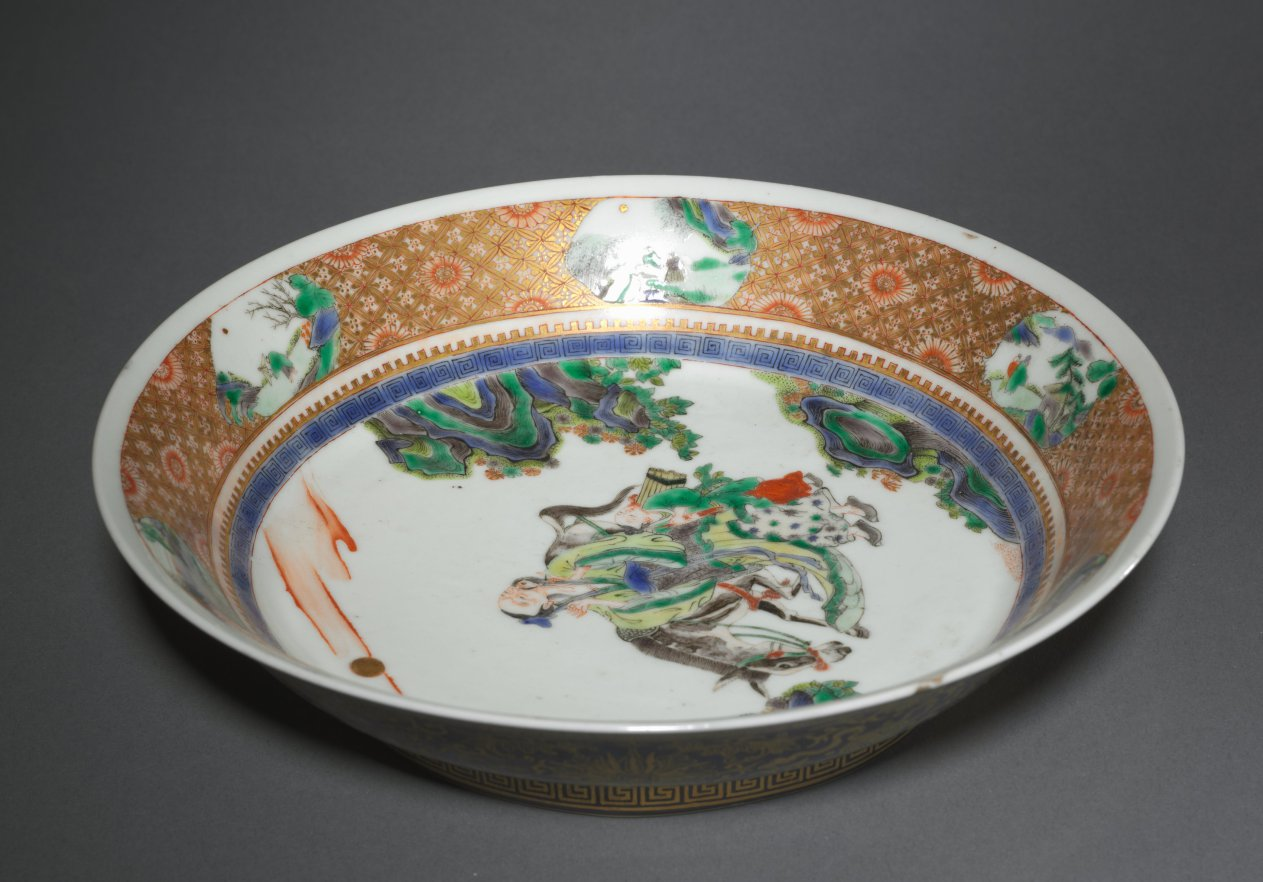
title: Dish with Zhang Guolao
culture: China, Jiangxi province, Jingdezhen kilns, Qing dynasty (1644-1911), Kangxi reign (1662-1722)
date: 1662–1722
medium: porcelain with famille verte overglaze enamel and painted gold decoration (interior) and powder blue glaze with painted decoration (exterior)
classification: Ceramic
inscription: 大清康熙年製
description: Zhang Guolao, featured on this dish, is one of the Eight Immortals and a gifted magician who was believed to know the secret arts to obtain longevity. Typically depicted as an old man and accompanied by his mule, he is the patron saint of artists. His mule is said to be magical; it can be folded up like a piece of paper to fit into a small bag. The central scene is framed by a sumptuously gold-decorated rim showing spaces reserved for landscape scenes in primarily fresh blue and green colors.